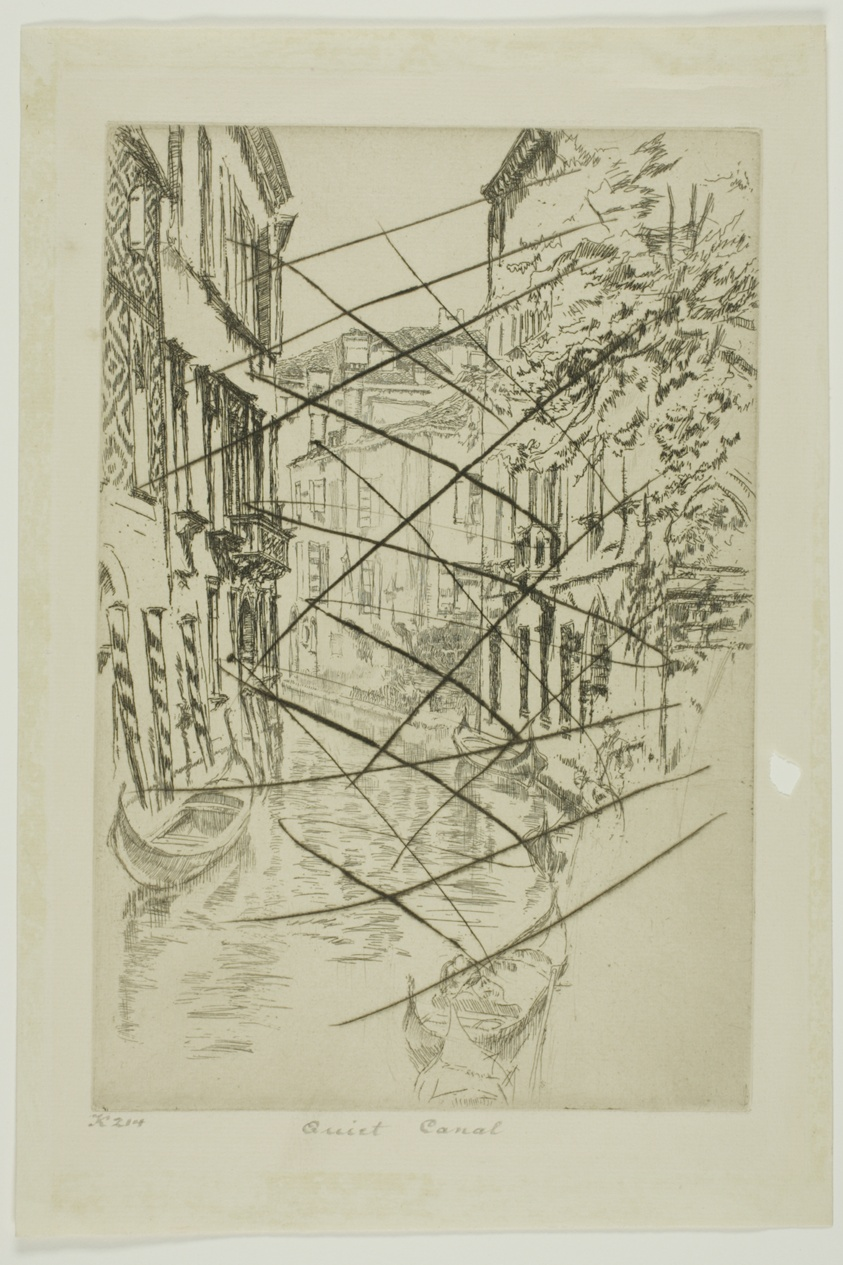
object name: Print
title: Quiet Canal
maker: James McNeill Whistler (American, 1834-1903)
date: 1879/80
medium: Etching and drypoint, with drypoint cancellation, in black ink on ivory laid paper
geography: United States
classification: etching; print; prints and drawing; drypoint; paper